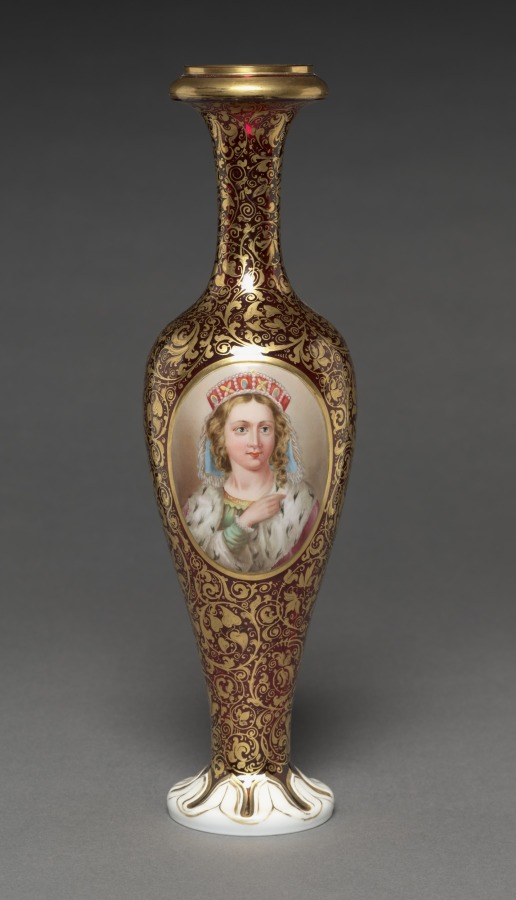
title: Vases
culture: Bohemia (?), 19th century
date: 1840–1860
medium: glass with enamel and gilt decoration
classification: Glass